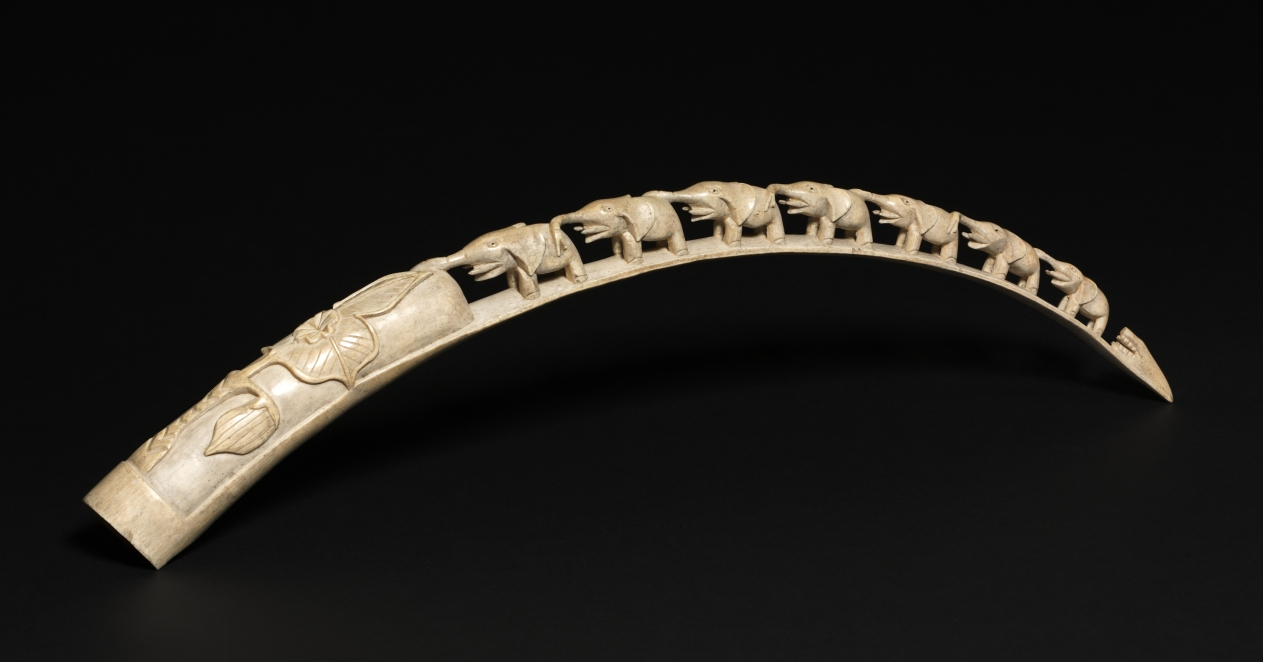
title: "Elephant Bridge" souvenir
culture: Central Africa, Democratic Republic of the Congo, 20th century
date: 1900s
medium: Elephant ivory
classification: Sculpture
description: This carving was made to appeal to Europeans and Americans in Central Africa, and did not draw from local aesthetics. It depicts an "elephant bridge," where the pachyderms are arranged with trunks and tails touching along the natural curve of an ivory tusk. Such compositions were often made in Japan, India, or China.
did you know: Skilled carvers in Central Africa could easily imitate other styles presented by patrons who commissioned works, such as this Congolese take on an Asian composition of elephants.